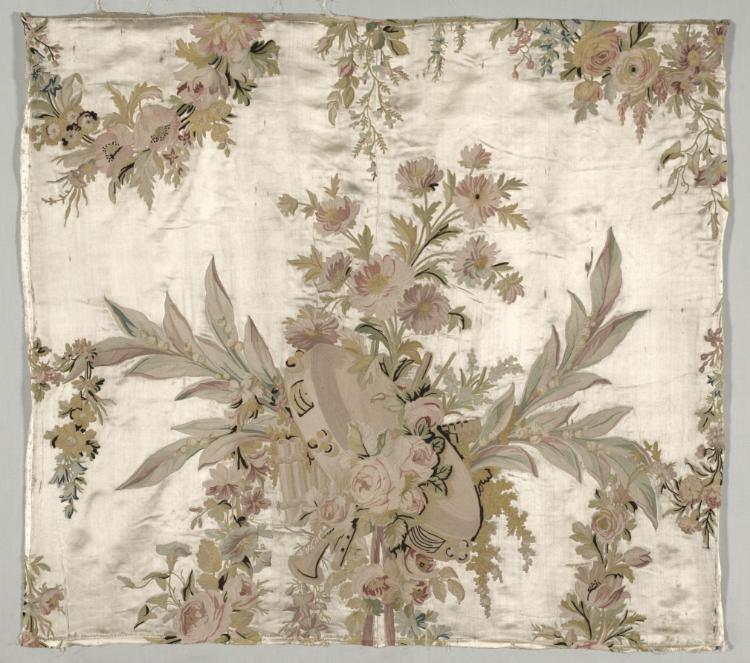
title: Coverlet Fragment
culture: France, 18th Century, period of Louis XVI (1774-1793)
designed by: Philippe de Lasalle (French, 1723–1805)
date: c. 1760–1770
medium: embroidered satin and silk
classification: Textile